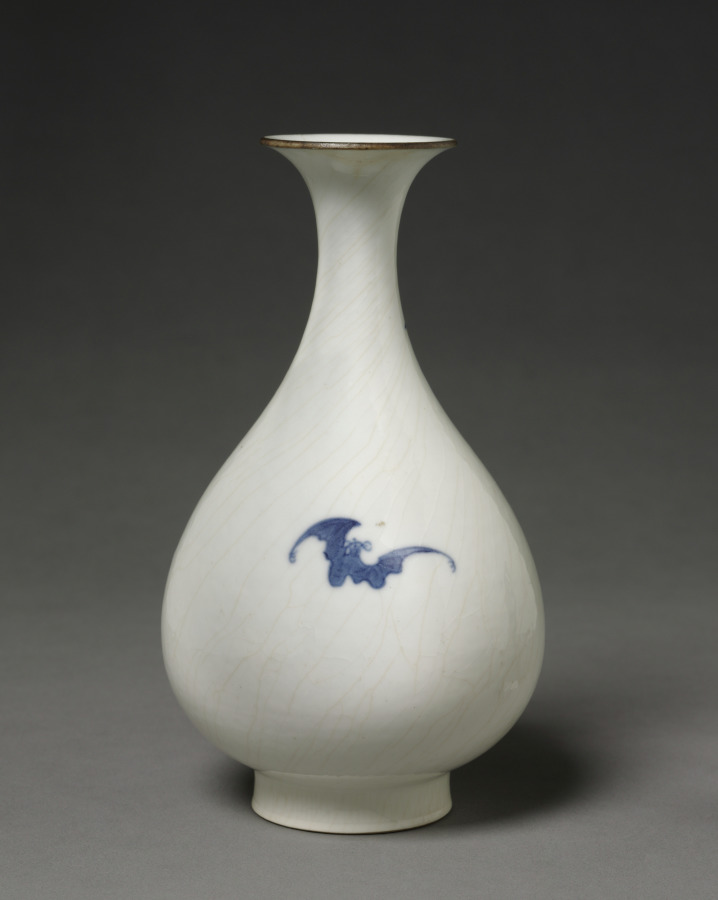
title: Pear-Shaped Vase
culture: China, Jiangxi province, Jingdezhen kilns, Qing dynasty (1644-1911), Yongzheng reign (1723-35)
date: 1723–35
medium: porcelain with underglaze blue decoration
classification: Ceramic